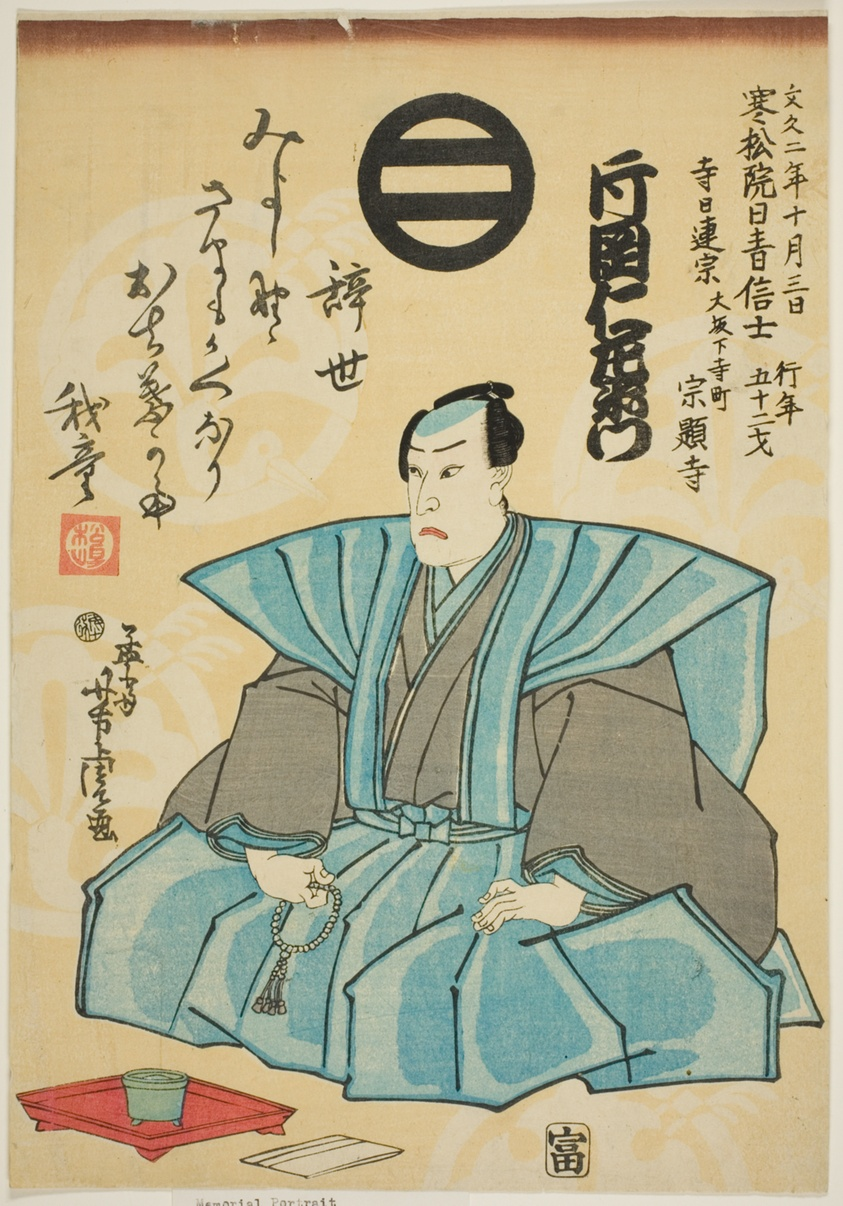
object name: Print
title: Memorial Portrait of the Actor Kataoka Nizaemon VIII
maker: Utagawa Yoshitora (Japanese, active c. 1836-87)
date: 1862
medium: Color woodblock print; oban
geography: Japan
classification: print; asian art